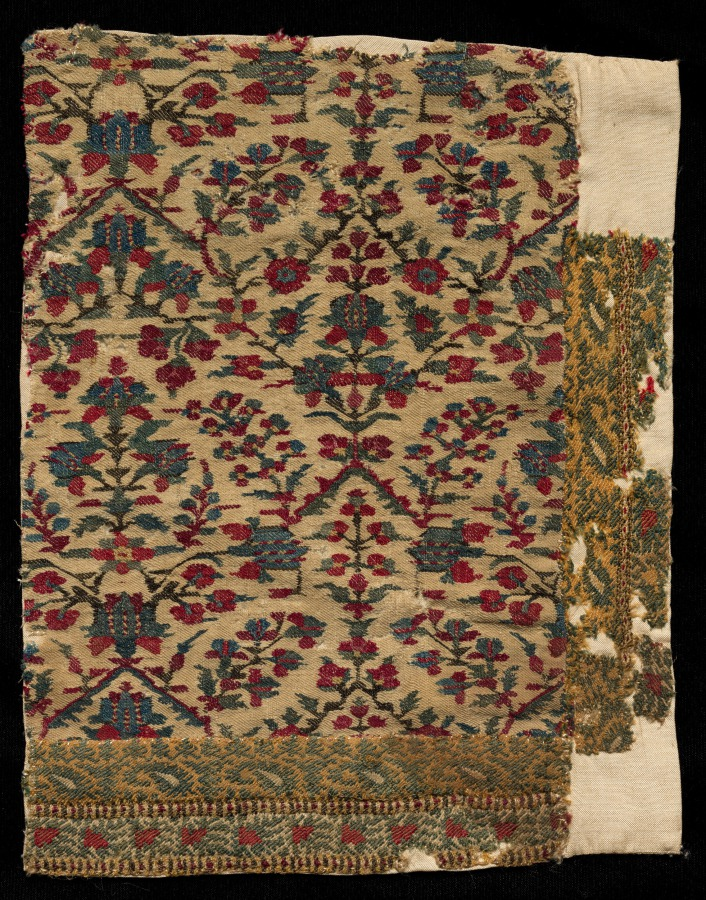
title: Border Fragment of a Shawl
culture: India, Kashmir, late 18th - early 19th century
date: late 1700s - early 1800s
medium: tapestry twill; wool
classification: Textile